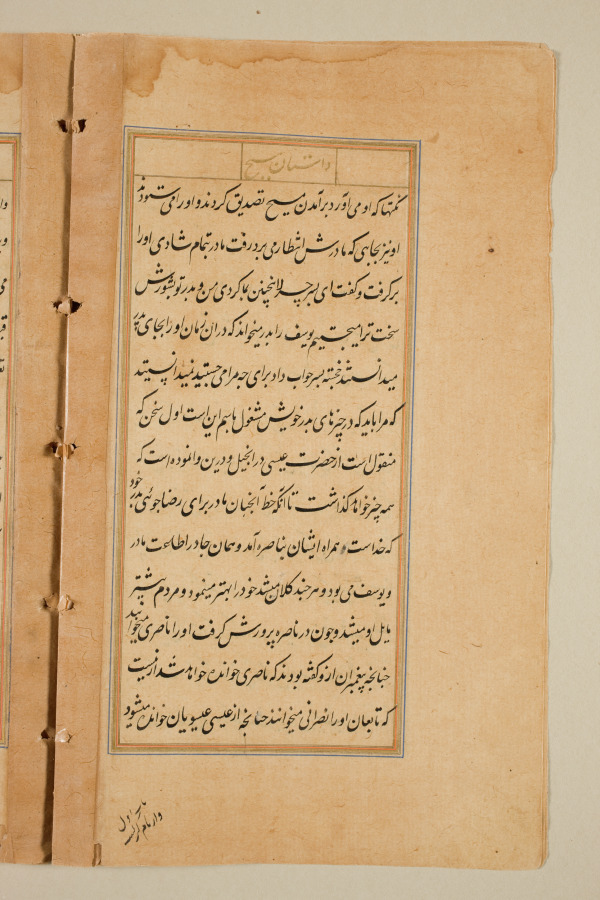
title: Text page from a Mirror of Holiness (Mir’at al-quds) of Father Jerome Xavier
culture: Mughal India, Allahabad, made for Prince Salim (1569–1627)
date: 1602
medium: Ink and gold on paper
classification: Manuscript